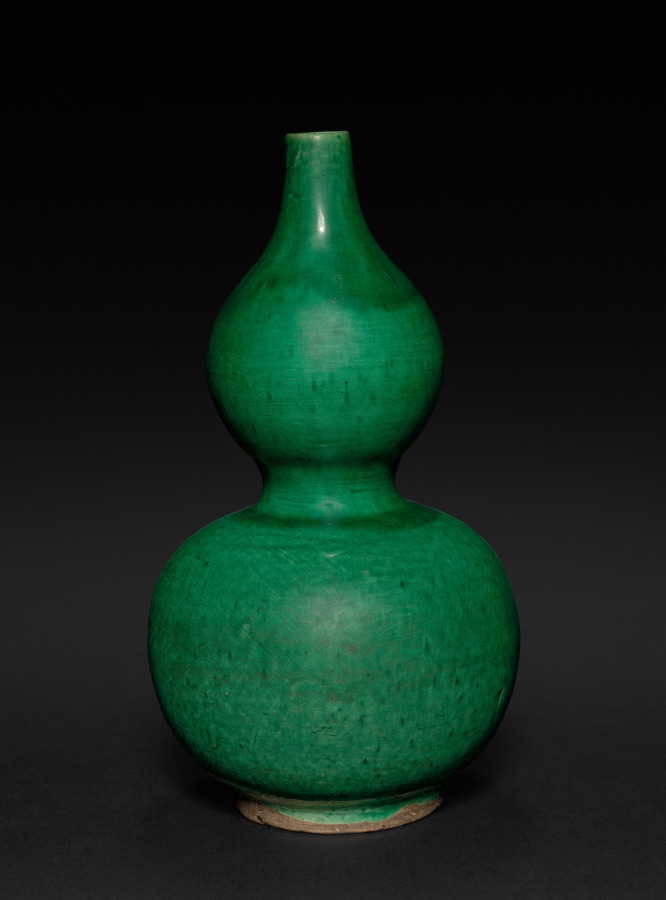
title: Double Gourd-shaped Green Vase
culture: China, Ming dynasty (1368–1644)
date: 1368–1644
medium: stoneware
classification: Ceramic